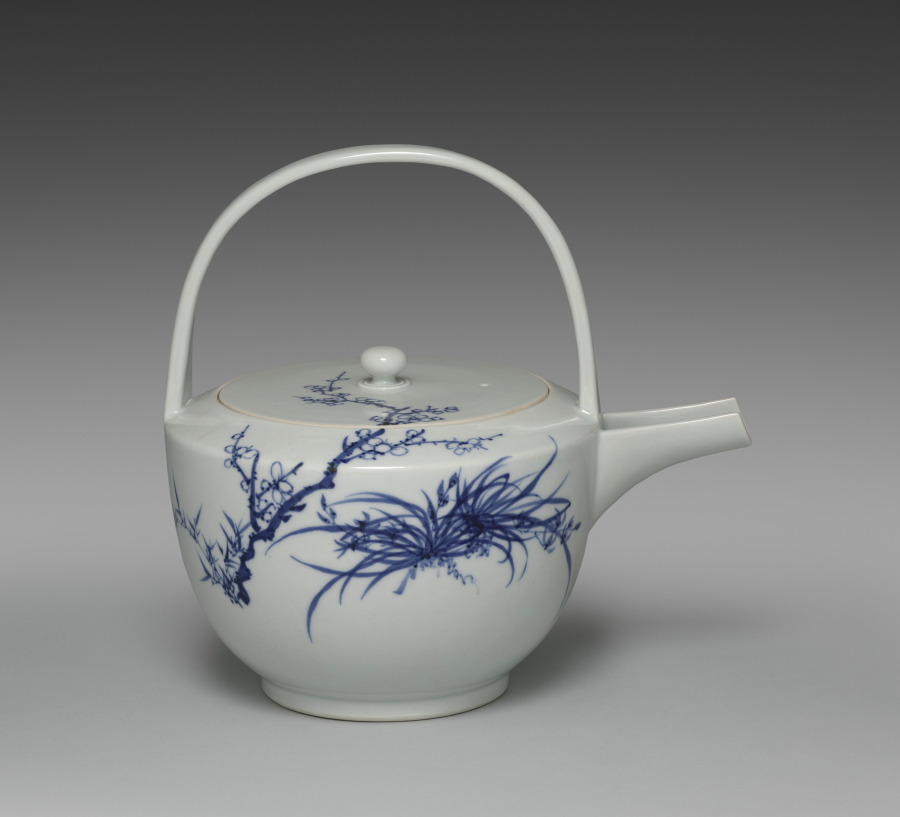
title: Sake Pourer with Chrysanthemum, Orchid, and Plum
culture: Japan, Meiji period (1868–1912)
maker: Seifū Yohei III (Japanese, 1851–1914)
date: c. 1887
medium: Porcelain with underglaze blue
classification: Ceramic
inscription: Artist's signature in underglaze blue on the base.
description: Seifū Yohei II and his successor, Seifū Yohei III, trained in ink painting. Their brush skills are seen in their underglaze cobalt blue designs. Orchid, bamboo, chrysanthemum, and plum, appearing on Yohei III’s sake pourer, are known as the Four Gentlemen. They symbolize the virtues of humility, integrity, endurance, and perseverance.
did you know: This sake pourer is decorated with the Chinese theme of the Four Nobles, in which the qualities of a good person are represented by plant.